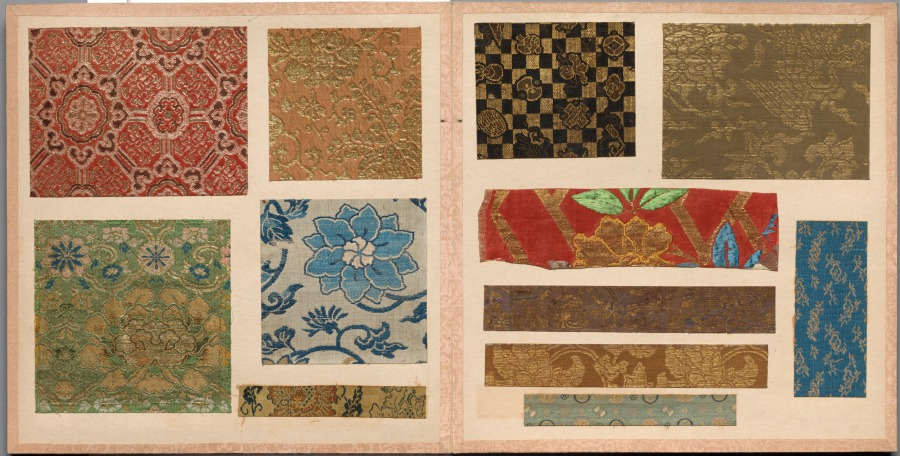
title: Album of Textile Samples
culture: Japan and China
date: 1700s–1800s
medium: silk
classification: Textile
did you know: This album has 26 pages containing 128 mounted Chinese or Japanese textile samples.